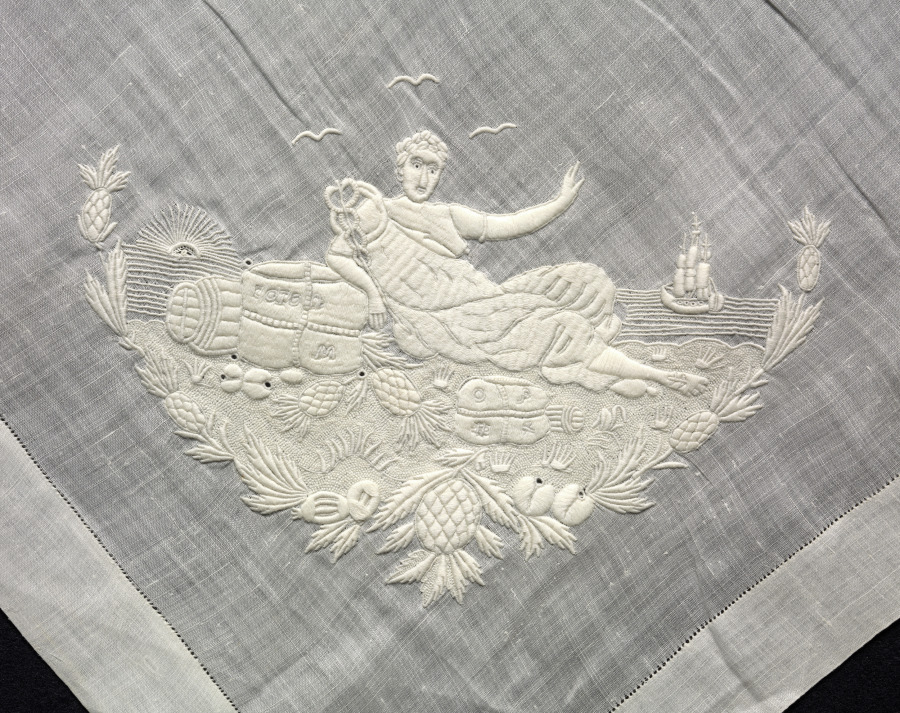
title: Embroidered Handkerchief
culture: Italy(?)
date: 1800s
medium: Plain weave linen, embroidered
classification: Embroidery